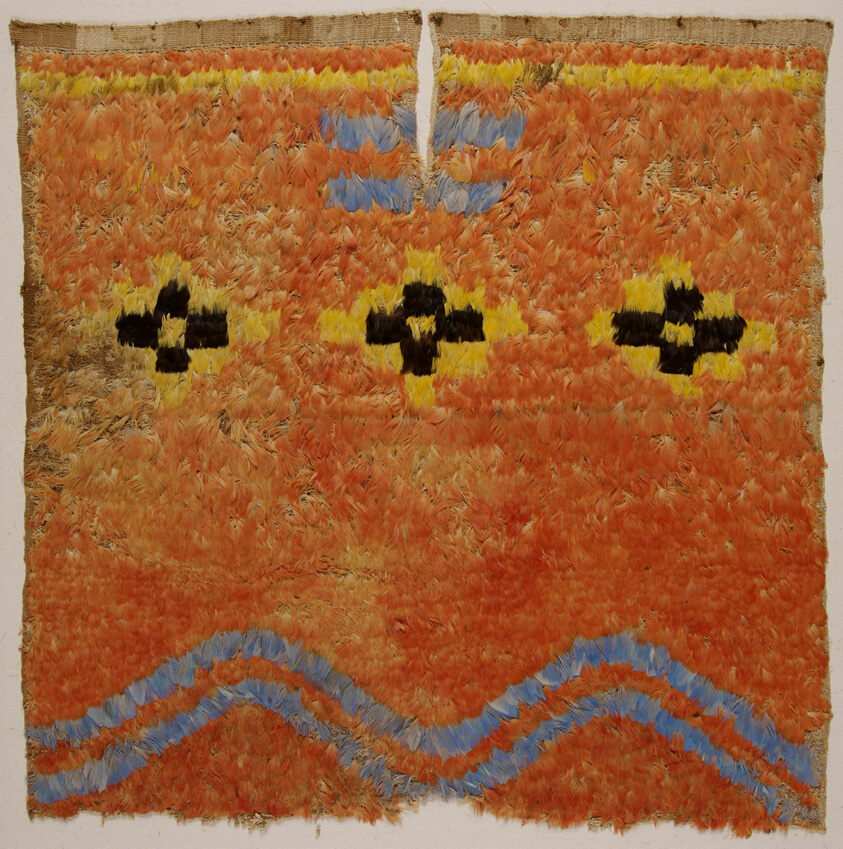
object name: Costume and Accessories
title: Half of a Tabard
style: peru, americas, Pre-Columbian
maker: Peru, Probably central or south coast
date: 1250-1450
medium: Cotton, plain weave; embellished with feathers (likely from Chilean flamigos, macaws, and Muscovy ducks) knotted and attached with cotton in overcast stitches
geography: Peru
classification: featherwork; needlework (visual works); textile; costume; garment; tunic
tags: geometric motif, lines, squares, zigzags